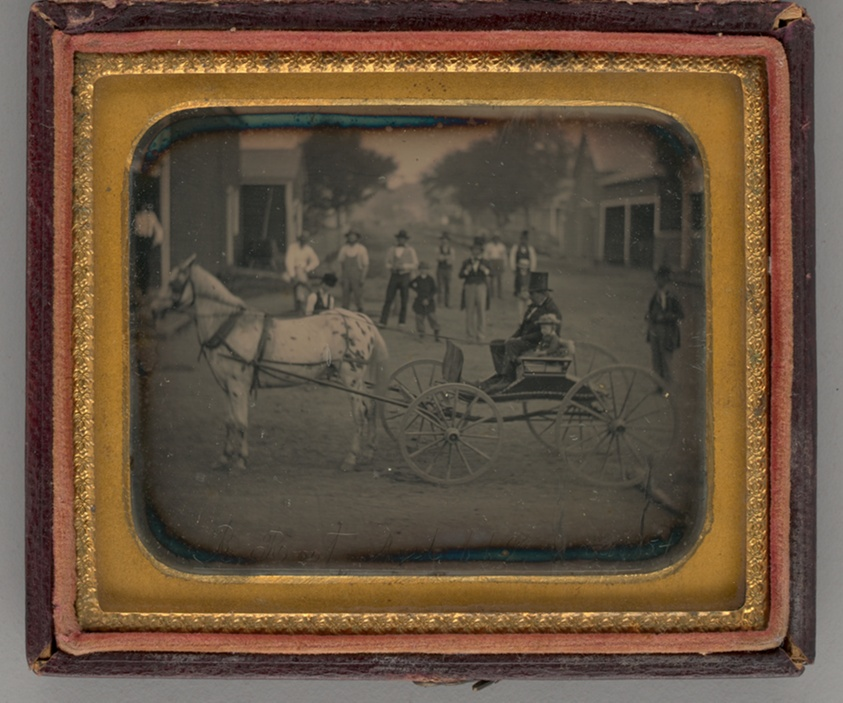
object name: Photograph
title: Untitled (Man with Top Hat and Boy atop Horse-Drawn Carriage)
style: 19th century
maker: Unknown maker; American, 19th century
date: 1854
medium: Daguerreotype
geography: United States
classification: portrait; daguerreotype; portrait; photograph; photographic process; photography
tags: lundberg collection, children, horse-drawn carriage, horses, people